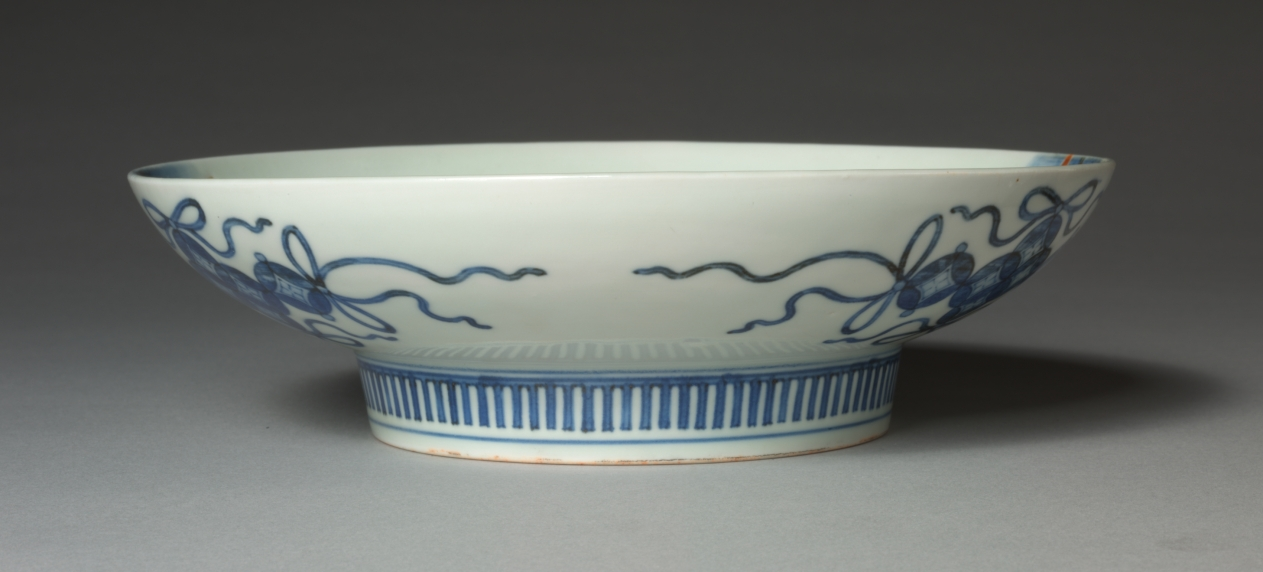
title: Dish with Reeds and Mist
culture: Japan, Edo period (1615–1868)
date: c. 1700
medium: Porcelain with underglaze blue and overglaze color enamel (Hizen ware, Nabeshima type)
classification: Ceramic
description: The interior of this dish features clusters of reeds emerging from mist. The gradation of blue wash in the background suggests that the scene is set by still waters, perhaps the banks of a river or edge of a marsh. The celadon, or pale green glaze, evocative of mist or fog, contrasts visually with the reeds and water.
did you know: Nabeshima dishes were produced in standard sizes of three, five, and seven sun (a traditional measurement of around 3 cm) in diameter.